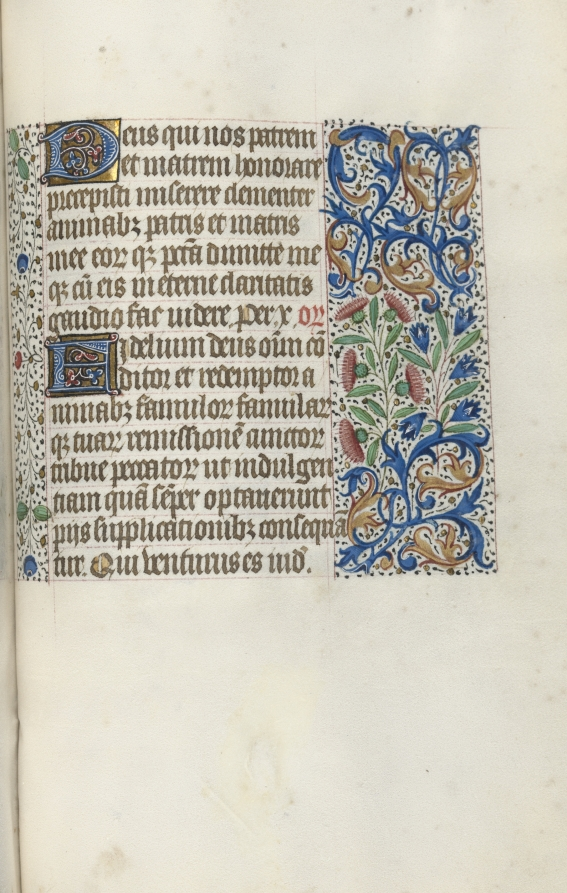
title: Book of Hours (Use of Rouen): fol. 146r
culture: France, Rouen, 15th century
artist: Master of the Geneva Latini (French, active Rouen, 1460–80)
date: c. 1470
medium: ink, tempera, and gold on vellum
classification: Bound Volume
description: In the late 1400s and early 1500s Rouen was an established and important center of book production. The city’s cathedral had a wealthy chapter that spent large sums of money to commission books and to maintain its extensive library. The stationers and booksellers would have likely been concentrated in or near the cathedral precinct. This artist, named after a manuscript now in Geneva, was Rouen’s principal illuminator during the second half of the 1400s.